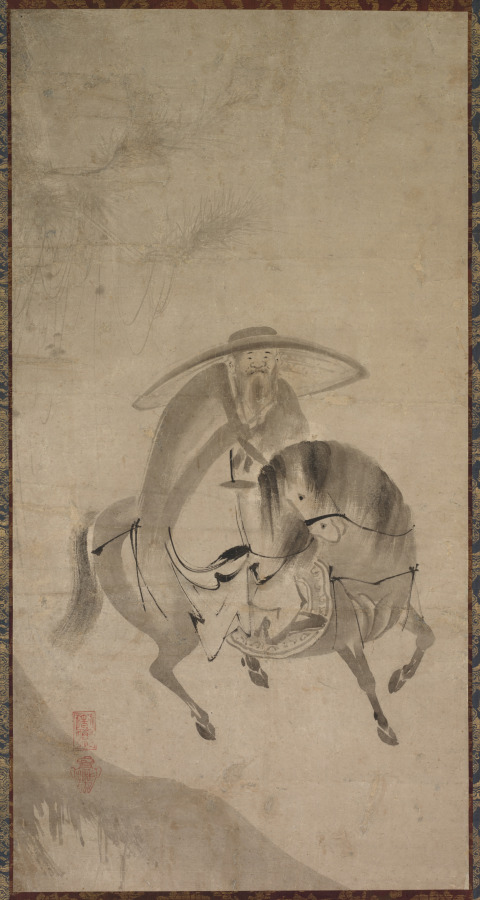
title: Su Dongpo Riding a Donkey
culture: Japan, Momoyama period (1573–1615)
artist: Reietsu (Japanese, active late 1500s to early 1600s)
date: late 1500s to early 1600s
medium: hanging scroll; ink on paper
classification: Painting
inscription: 落款 秀景 ？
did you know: Su Dongpo 蘇東坡 (1037–1101) was the leading Song dynasty poet and artist.